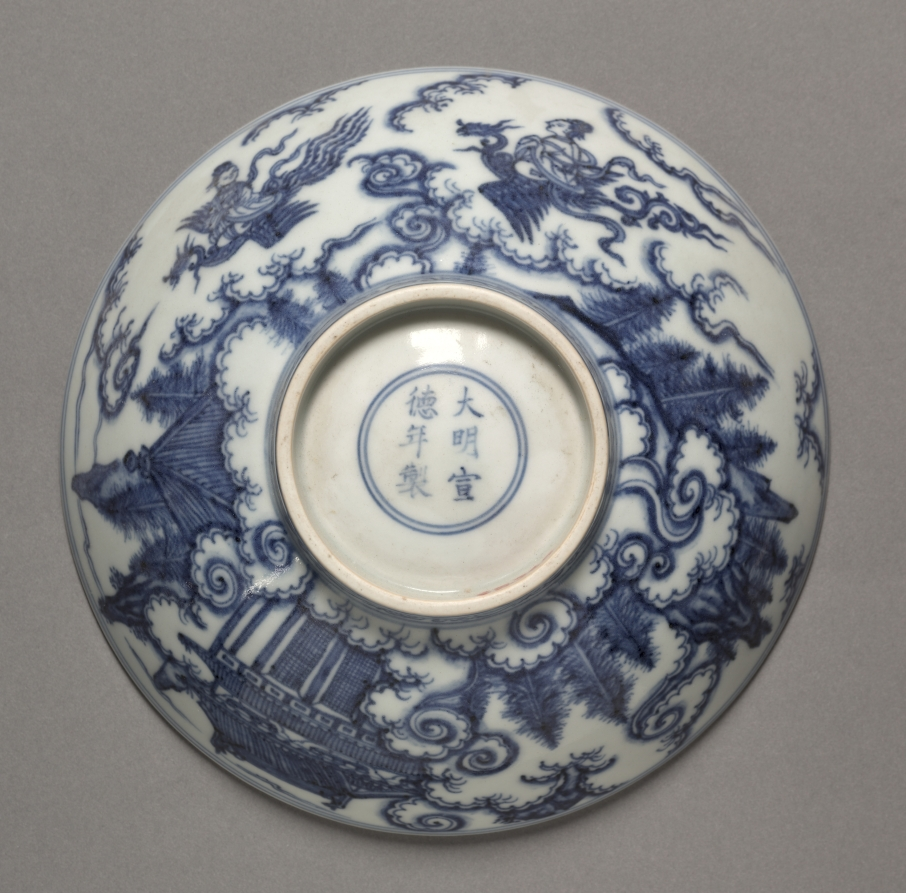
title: Bowl with "Land of Daoist Immortals" Scene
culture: China, Ming dynasty (1368-1644), Xuande mark and reign (1426-35)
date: 1426–35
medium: porcelain with underglaze blue decoration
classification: Ceramic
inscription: 大明宣德年製